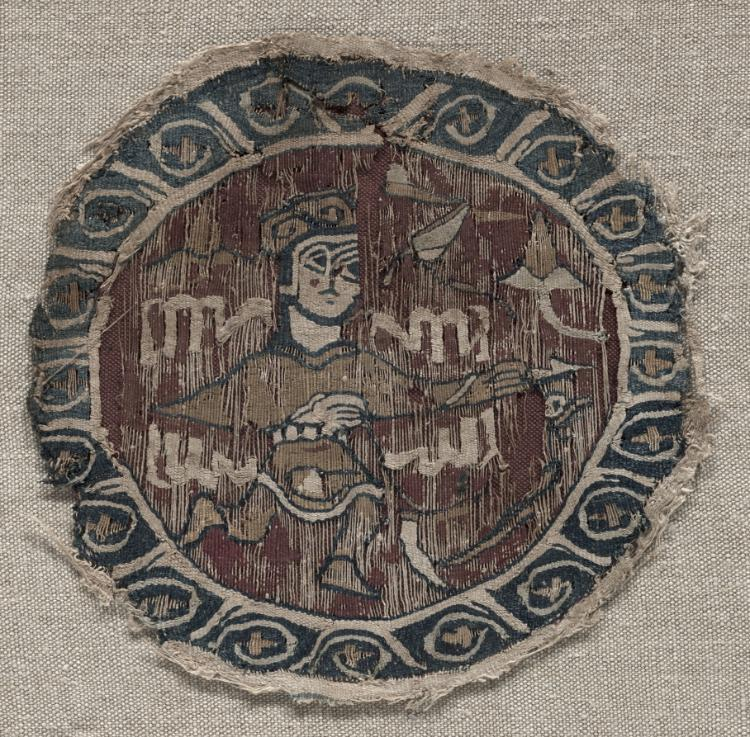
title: Roundel with figure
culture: Egypt, Fatimid period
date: 1000s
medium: Linen and silk: plain weave with inwoven tapestry weave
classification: Textile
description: A running figure clad in a short tunic, turban, and low boots is portrayed in this roundel. The figure holds in his right hand a string attached to a falcon which stands in the space beneath his outstretched left hand. In the upper background are foliate forms on long curving stems. The roundel is framed with a border decorated with a pseudo-inscription in deformed Kufic letters against a floriate background.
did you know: The Arabic word for God, written in Naskhi, appears below the figure's left arm and repeats upside down in the other spaces around him.